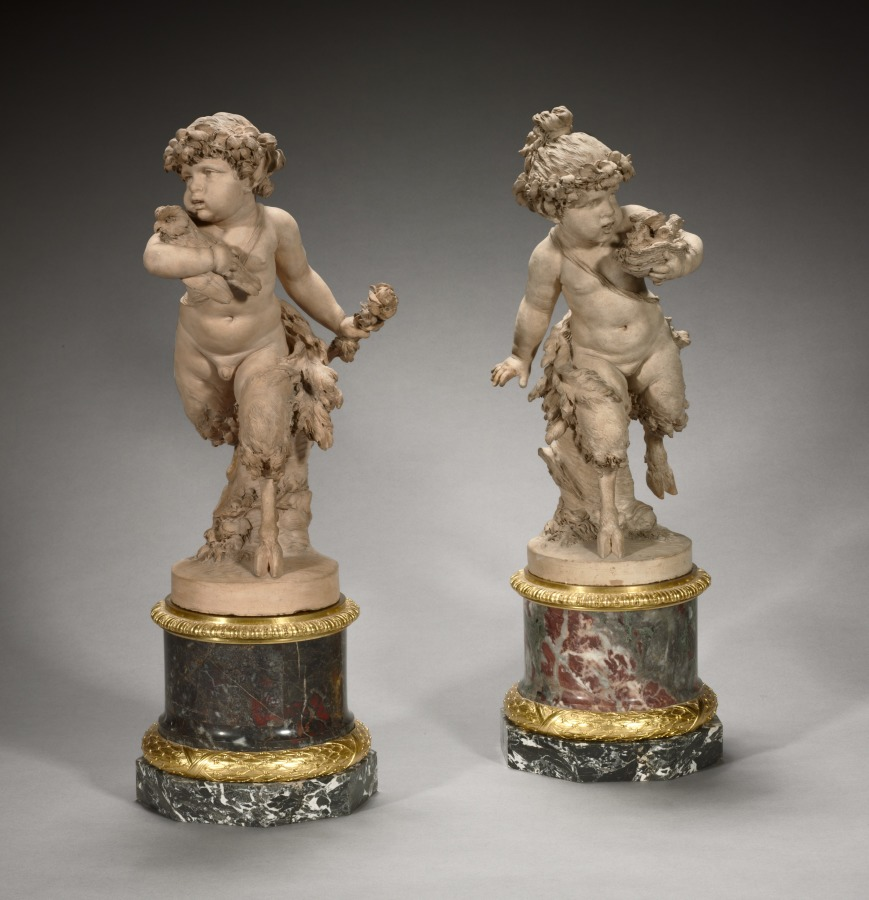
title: Young Satyress Running with an Owl's Nest and Young Satyr Running with an Owl (pair of statuettes)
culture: France, 18th century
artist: Clodion (French, 1738–1814)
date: 1770s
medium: terracotta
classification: Sculpture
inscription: signature incised on back: CLODION.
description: These works by the French sculptor Claude Michel, called Clodion, show a pair of young satyrs. Clodion was fond of depicting characters from classical antiquity in his work, and the subject of child or baby satyrs in Bacchanalian celebrations appears often in the work of Rococo artists. The female satyr wraps a plump arm around a nest filled with baby birds, while her male counterpart holds an owl. Balancing on one foot, the two flee the scene of their theft.